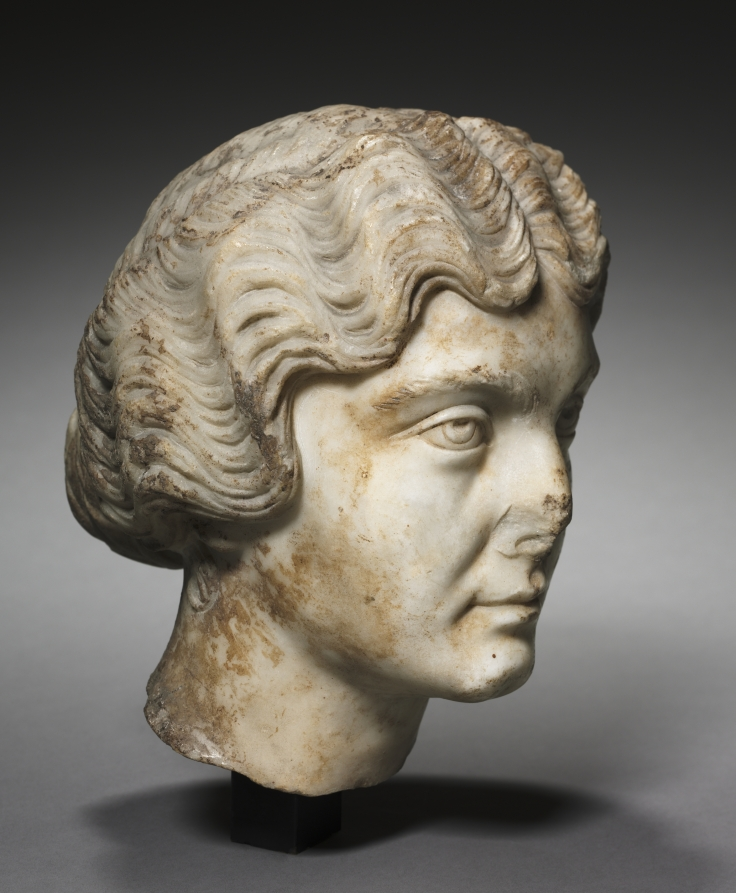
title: Portrait Head of a Woman, Probably the Empress Faustina Minor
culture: Italy, Roman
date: c. 165 CE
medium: marble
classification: Sculpture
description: Acquired in 1925, this head was initially identified as a portrait of the Empress Lucilla (lived AD 149-182), wife of the Emperor Lucius Verus, who co-ruled with Marcus Aurelius from AD 161-169. More recently, scholars have identified the portrait as a representation of the Empress Faustina Minor (lived c. AD 130-176/177), wife of Marcus Aurelius (r. 161-180) and mother of Lucilla. The two women, relatively close in age, share a number of portrait features: heavy-lidded eyes, with incised irises and pupils; small mouth; and a distinctive hairstyle, parted in the center and pulled back in waves to a braided knot at the base of the neck.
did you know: Scholars have disagreed about this portrait's identity—probably an empress, either Faustina Minor or Lucilla.